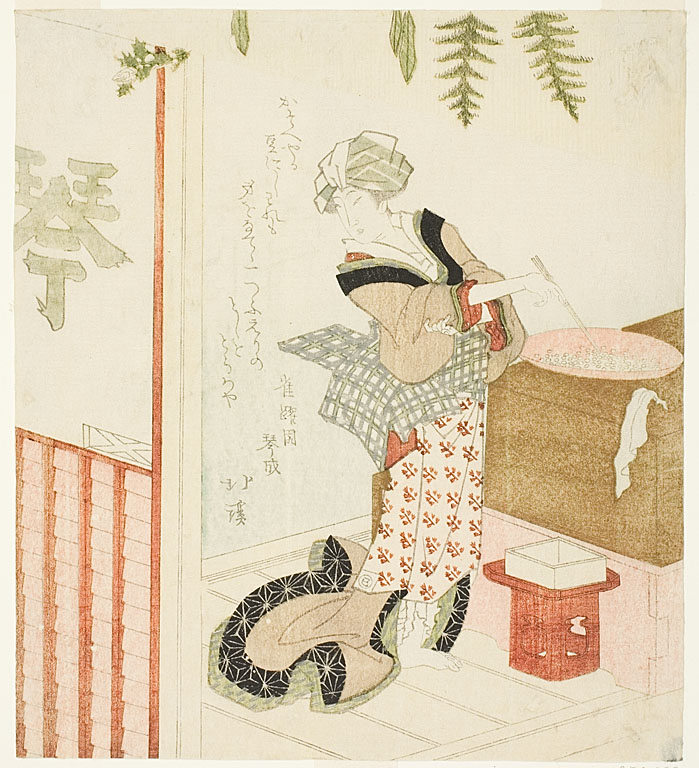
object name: Print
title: Woman Cooking Beans in the Store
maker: Totoya Hokkei (Japanese, 1780-1850)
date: early 19th century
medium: Color woodblock print; surimono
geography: Japan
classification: woodblock print; print; asian art